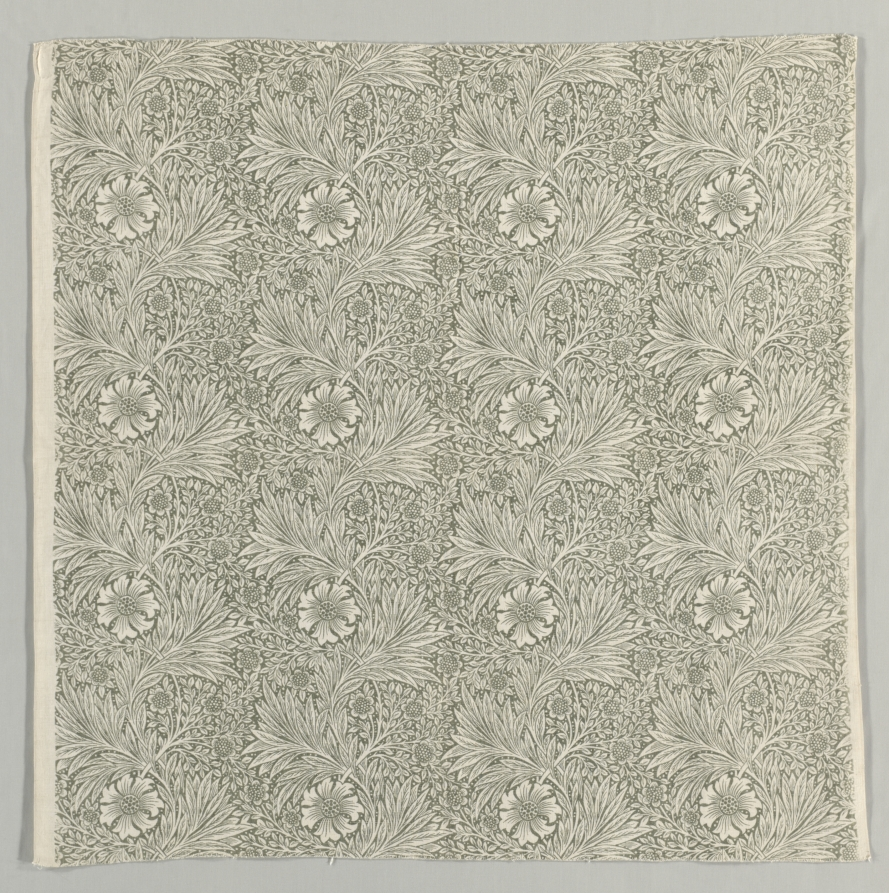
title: Marigold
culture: England, 20th century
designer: William Morris (British, 1834–1896)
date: 20th century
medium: plain weave cotton, printed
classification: Textile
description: Among Morris’s first designs for printing on fabric, Marigold was originally intended for use on wallpaper, as seen in the image below. It was one of only a few patterns that clients could buy as both textile and wallpaper; it was also printed on linoleum. The wide variety of media available in Marigold speaks to the broad decorative application of its lively organic pattern. Here, blossoms and vines spread with ordered freedom, generating a sense of movement and demonstrating Morris’s revolutionary principle of “rational growth,” which set his designs apart from the formal, rigid patterns of his competitors.